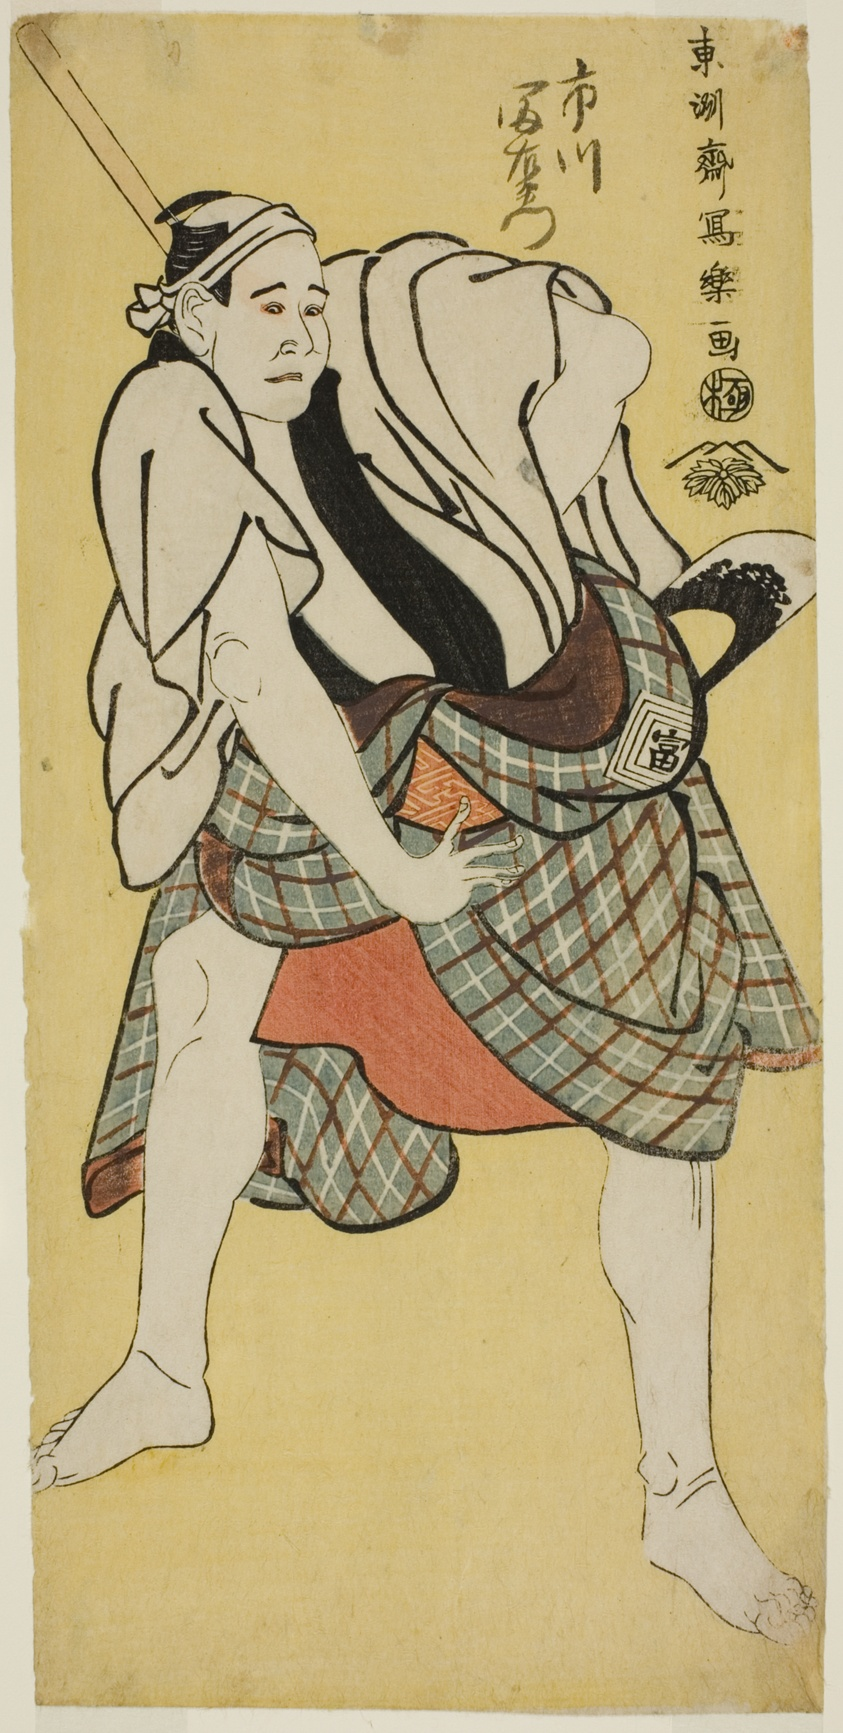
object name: Print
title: The actor Ichikawa Tomiemon as Inokuma Monbei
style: Japanese (culture or style)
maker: Toshusai Sharaku 東洲斎 写楽; Japanese, active 1794-95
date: 1794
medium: Color woodblock print; hosoban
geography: Japan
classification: woodblock print; print; asian art